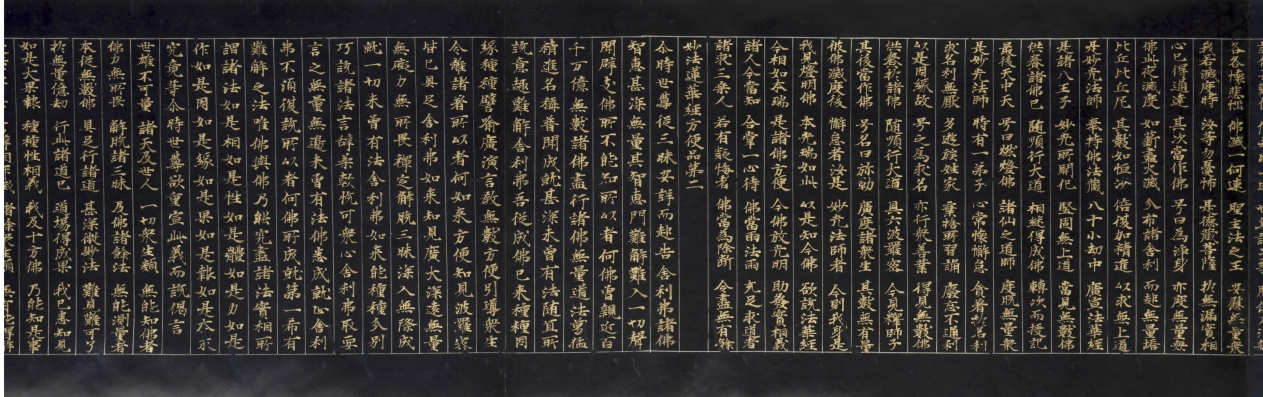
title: Lotus Sutra with a Frontispiece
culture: China, Song dynasty (960–1279)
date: late 1100s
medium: handscroll; gold ink on indigo sutra paper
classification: Painting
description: The frontispiece of this sutra, a sacred Buddhist scripture, illustrates episodes mentioned in the Buddha’s teaching. The sutra begins with a description of the historic Buddha Shakyamuni’s assembly on Vulture Peak. On the right, the Buddha sits amid members of his congregation: lohans (or arhats), bodhisattvas, gods, and other beings. The narrative proceeds from right to left. Heavenly light emanates from Shakyamuni’s brow to “illuminate the eighteen thousand worlds to the east.” Illustrated immediately below the ray is the sutra’s promise that if anyone carves or paints images of the Buddha “they will achieve the Buddha path.” The female figures in the frontispiece point to another promise made in this popular Mahayana school sutra, namely that female devotees and nuns who read the sutra are promised Buddhahood and salvation.